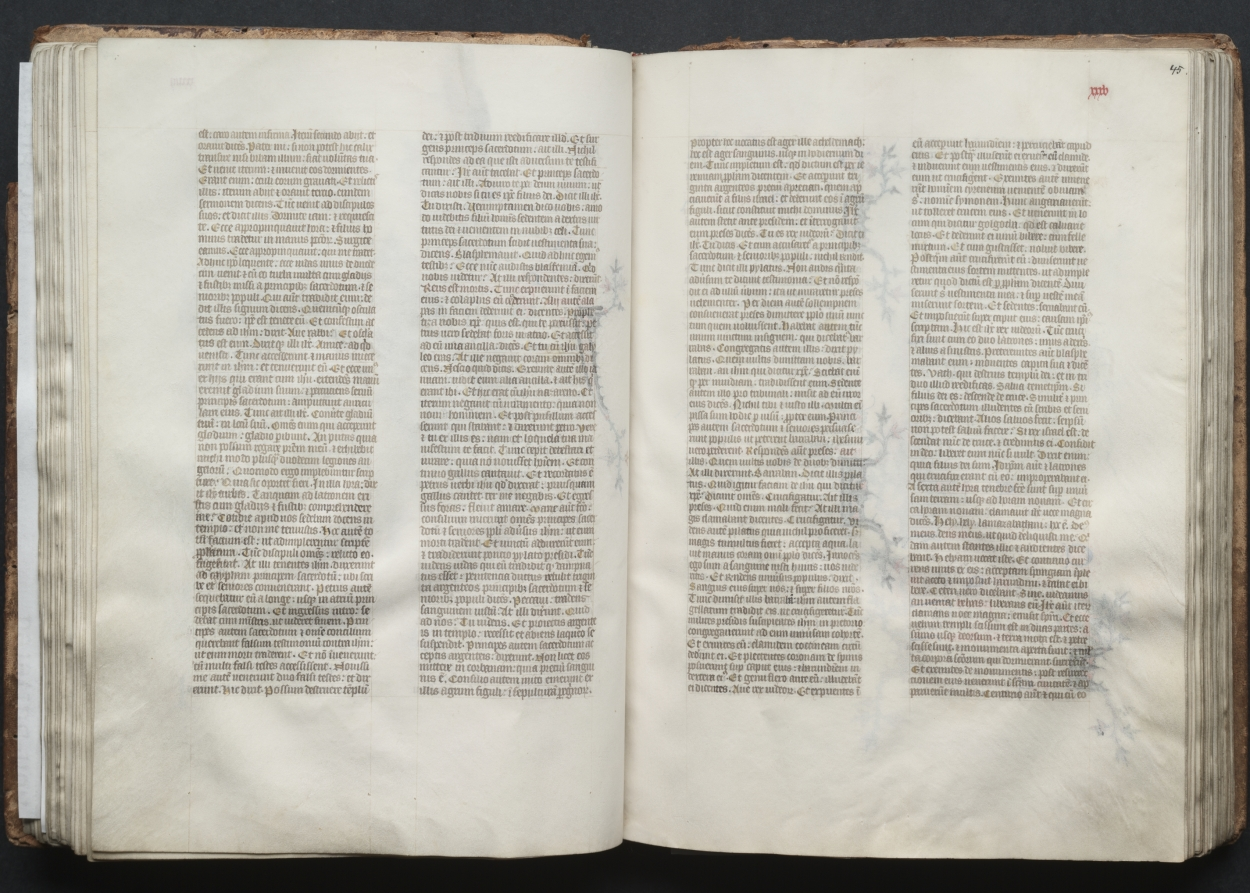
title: The Gotha Missal: Fol. 44v, Text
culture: France, Paris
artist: Master of the Boqueteaux (French)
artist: and Workshop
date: c. 1375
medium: ink, tempera, and gold on vellum; blind-tooled leather binding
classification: Bound Volume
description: The style and quality of this manuscript's decoration is typical of deluxe Parisian books made for aristocratic or royal patrons. Most of the book's decoration appears to be the work of the Master of the Boqueteaux, an artist active at the court of King Charles V (died 1380). His style was apparently shared by a number of book illuminators working in and around Paris. It is very possible that the Gotha Missal belonged to Charles V, but is not provable because the manuscript has no royal portraits and lacks a colophon. Given the book's magnificent decoration, however, it would seem that it was produced for a Valois prince, if not for the king himself. The manuscript receives its name from the German dukes of Gotha, its later owners.